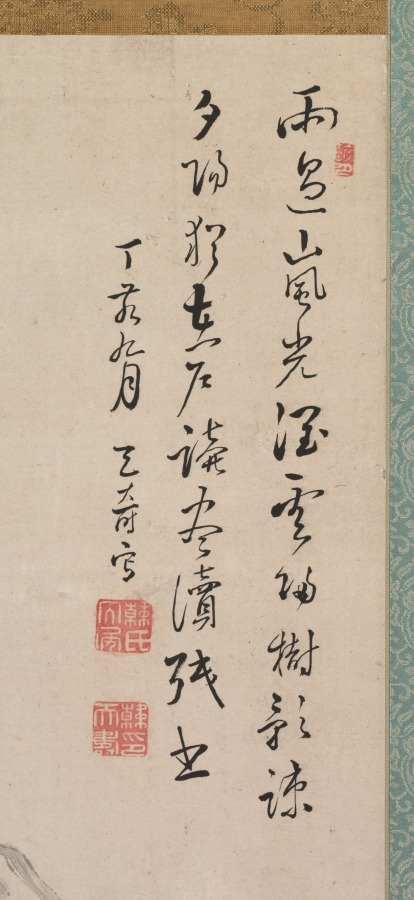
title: Landscape with Gentle Peaks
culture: Japan, Edo period (1615–1868)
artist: Kan Tenju (Japanese, 1727–1795)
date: 1767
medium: hanging scroll; ink and light color on paper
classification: Painting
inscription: 雨過嵐光煙／雲陽樹影諫／夕陽独在左／？卷讀残書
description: A figure sits in a retreat tucked into the mountains near a waterfall. The painter, Kan Tenju, was best known as a calligrapher and seal carver. Of Korean heritage, he was a patron of artist Ike Taiga (池大雅) (1723–1776), and a cousin of Taiga’s student Aoki Shukuya (青木 夙夜) (died 1802). His Chinese-style poem reads as follows: Smoky mist in the mountain reflects light after the rain, Sunlight passes through the clouds to cast shadows of the trees, Alone in the sunset, I read a well-worn book.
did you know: This painting combines image and calligraphy, connected by skillful brushwork.